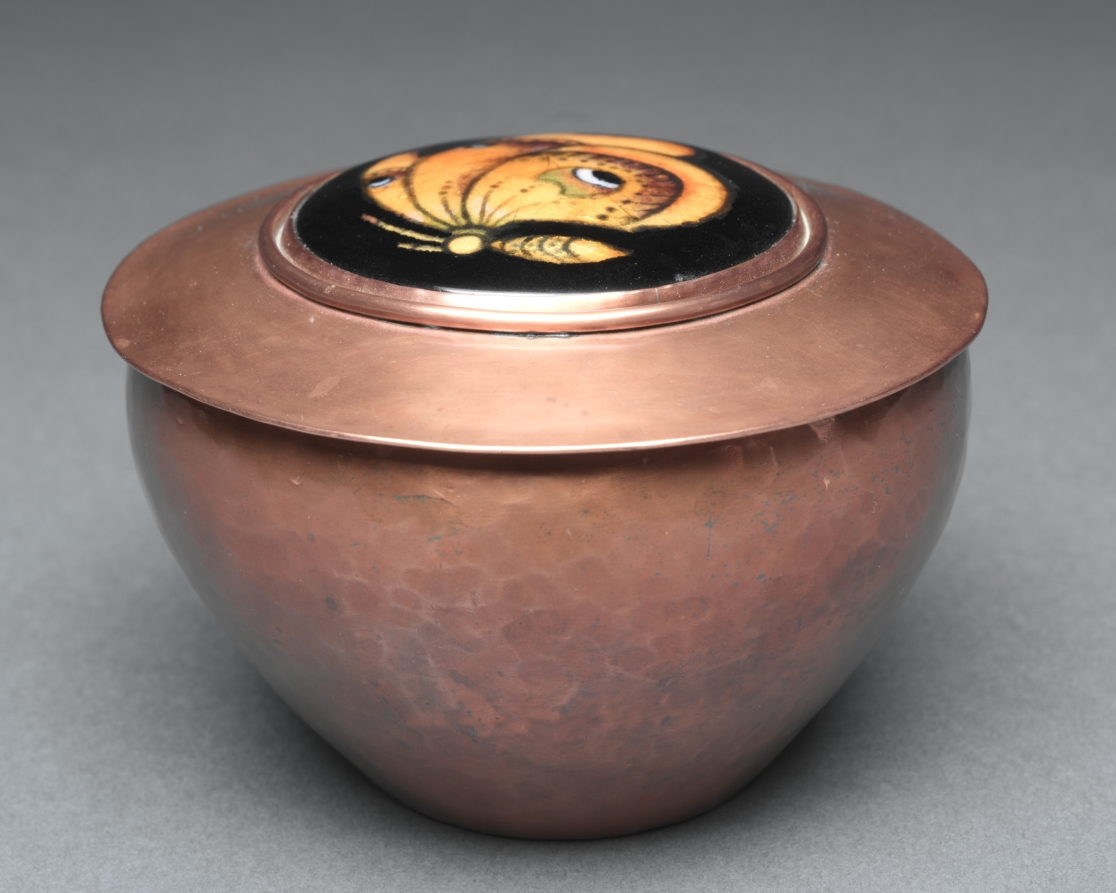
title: Covered Bowl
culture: America, Ohio, Cleveland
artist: Kenneth F. Bates (American, Cleveland, 1904–1994)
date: 1927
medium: copper and enamel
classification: Enamel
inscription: incised on bottom: "Kenneth F. Bates 1927."